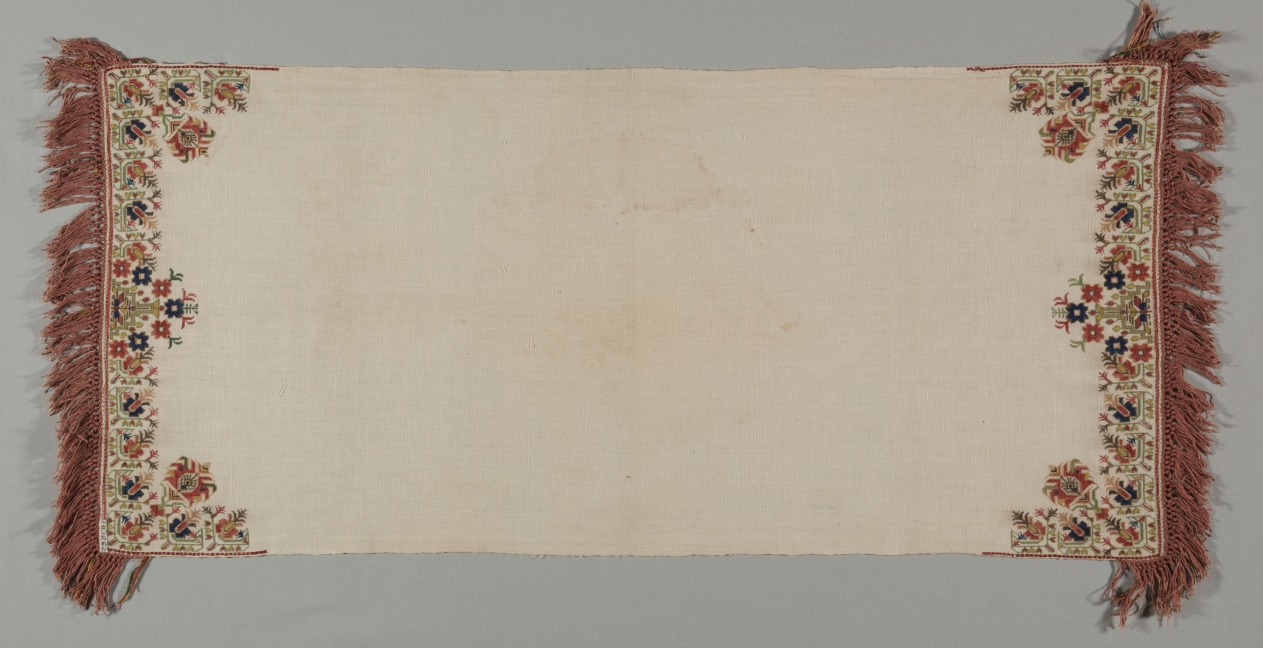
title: Embroidered Towel (Peshkir)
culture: Turkey, 19th century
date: 19th century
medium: embroidery: silk on cotton tabby ground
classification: Embroidery